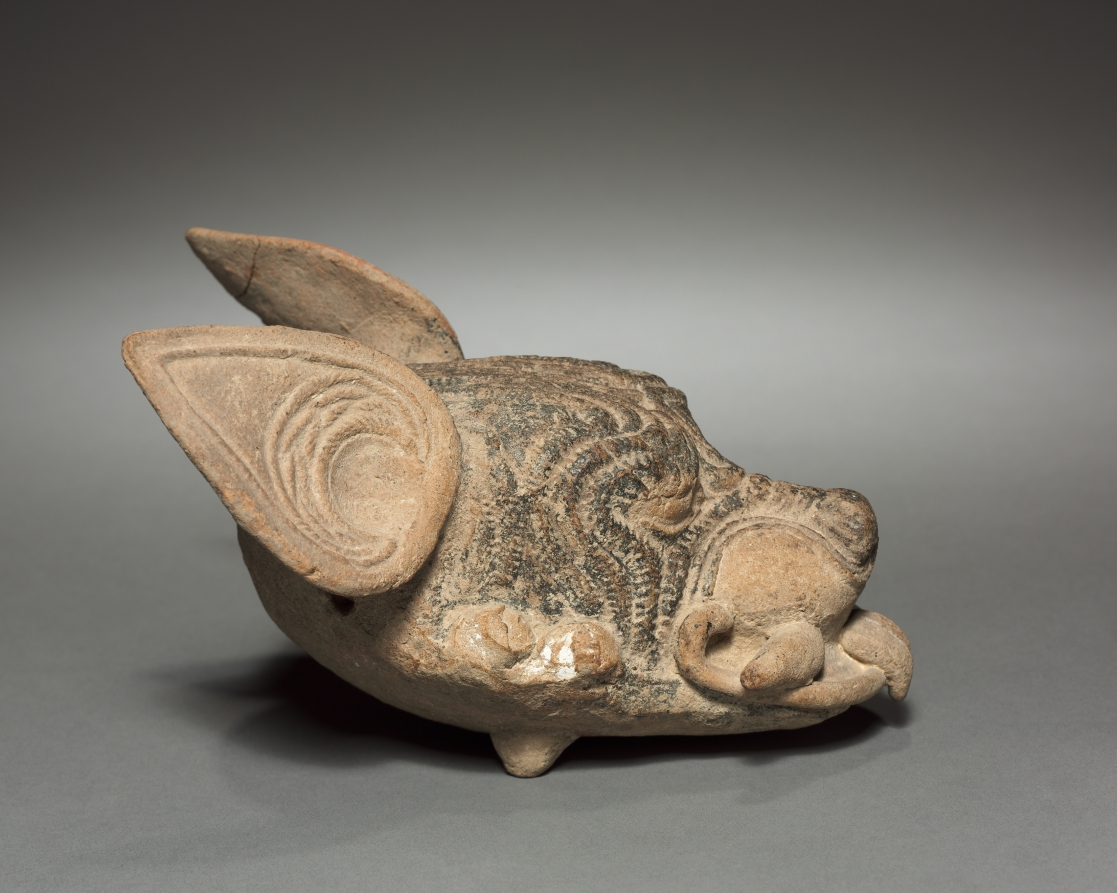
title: Dog Head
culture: Mexico, Gulf Coast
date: 500–1000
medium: earthenware, asphalt and resin paint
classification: Sculpture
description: This dog's snarl and protruding fangs lend him a sinister expression. Although pierced for suspension, the head seems too large and fragile to have been a pendant. Press-molds, used to create the dog's face and ears, were commonly used in the Gulf Coast region, where asphalt occurs naturally and was applied to pottery as a paint after firing.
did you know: This ceramic was analyzed using thermoluminescence dating; it was fired between 900 and 1,500 years ago.